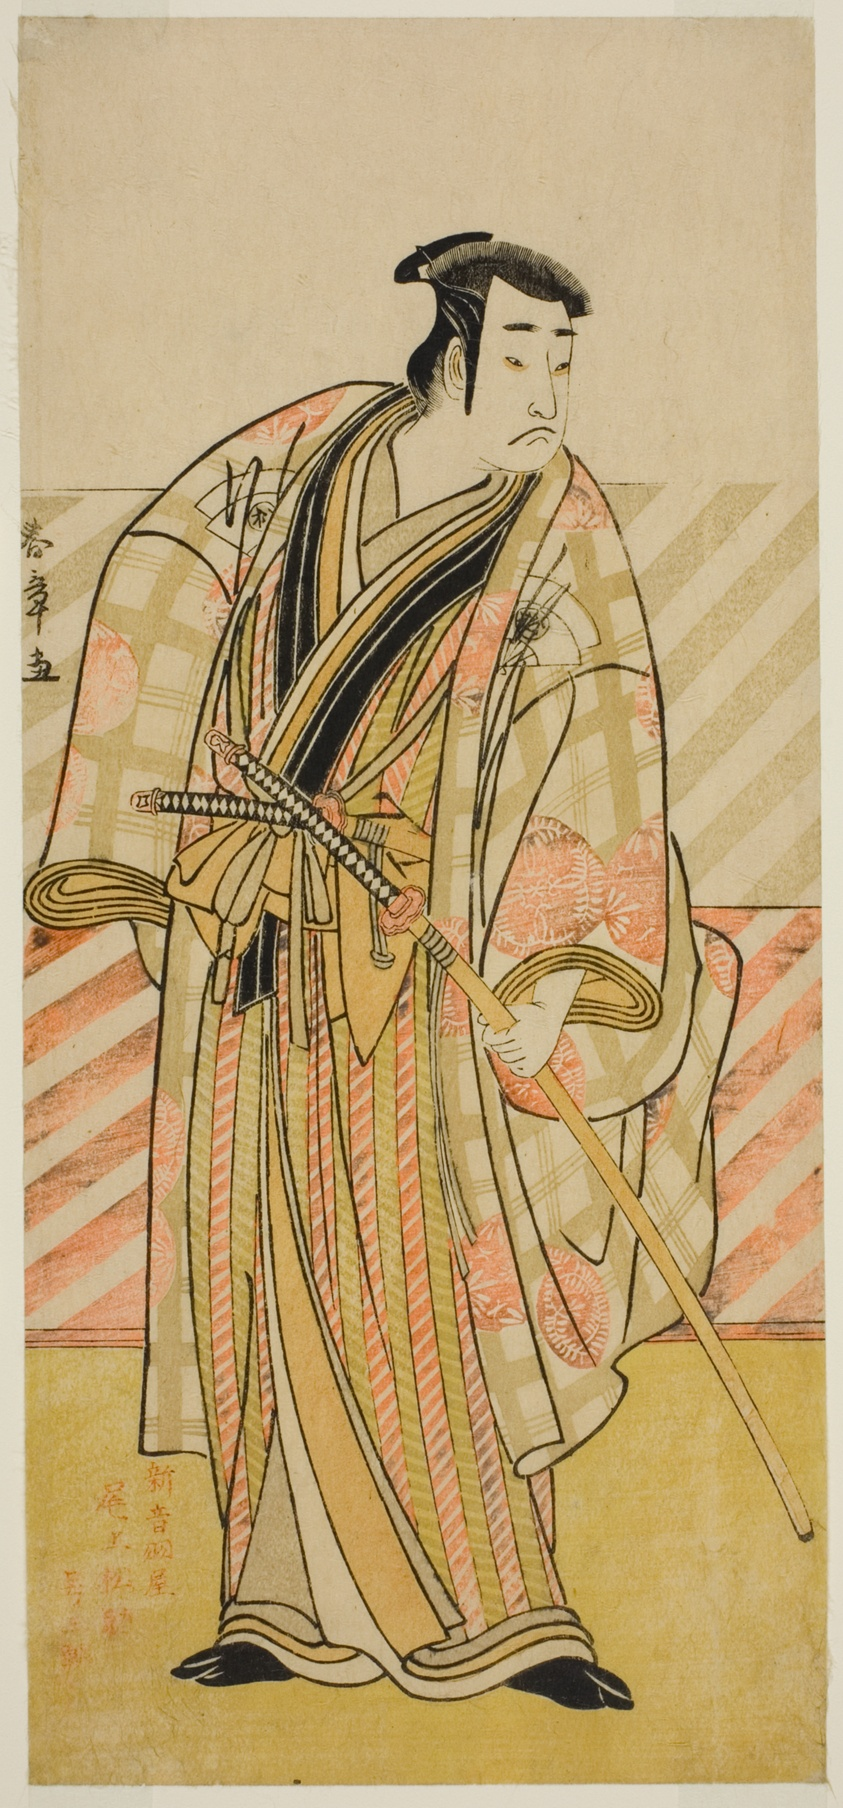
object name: Print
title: The Actor Onoe Matsusuke I in an Unidentified Role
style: Japanese (culture or style)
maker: Katsukawa Shunsho 勝川 春章; Japanese, 1726-1792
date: c. 1782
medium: Color woodblock print; hosoban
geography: Japan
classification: woodblock print; print; asian art